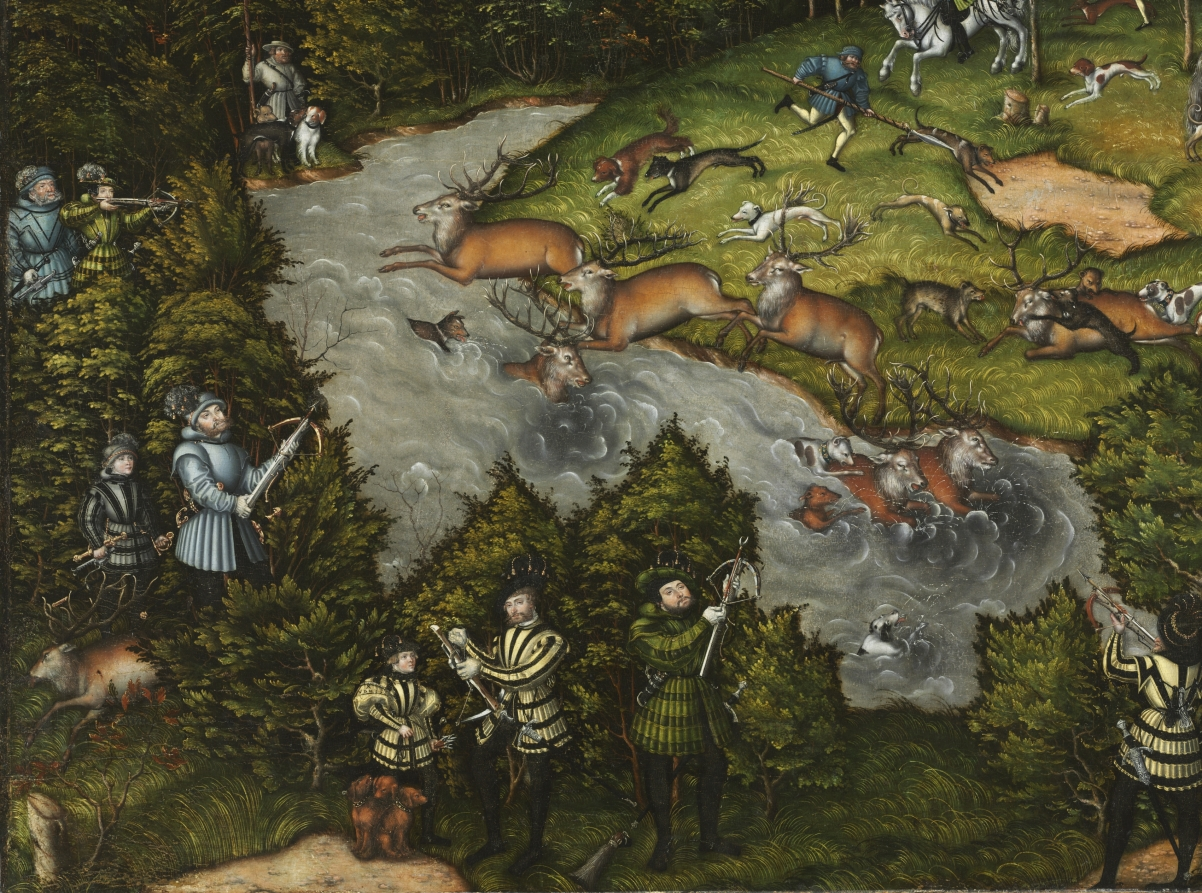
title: Hunting near Hartenfels Castle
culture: Germany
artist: Lucas Cranach (German, 1472–1553)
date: 1540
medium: oil, originally on wood, transferred to masonite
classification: Painting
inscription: Signed lower right on boat with a winged serpent, and dated: 1540 [inventory number, lower right: 1577]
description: The Protestant rulers of Saxony commissioned this animated hunt scene, set near their residence seen in the background, Hartenfels Castle (in eastern Germany). John Frederick the Magnanimous, in the bottom left corner, wears dark green hunting attire; he spans his crossbow and waits for his courtiers and dogs to chase a stag across the river. His wife, the Electress Sibylle, stands at right, poised to take the first ceremonial shot. The prince electors of Saxony were passionate practitioners of hunting with dogs—elaborate, highly rehearsed occasions, coordinated by the use of signals from hunting horns. Cranach dated this work and his signature is the winged snake at lower right. 1577 in the right corner is an inventory number.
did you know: Humans, dogs, and deer make up most of the creatures in this busy scene—but not all of them! Look closely at the background to spot a bear and three boars.